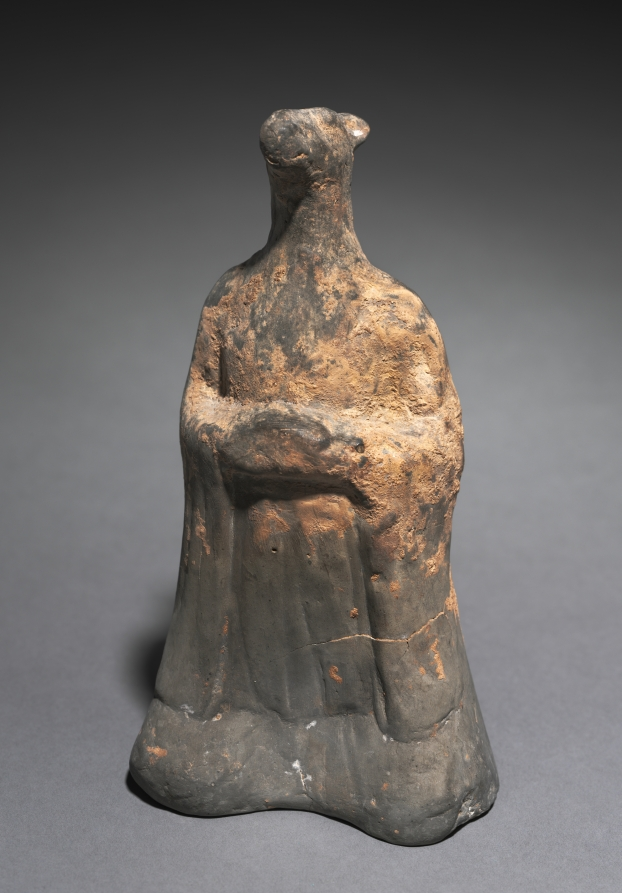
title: Mortuary Figure of the Zodiac Sign: Horse (Libra)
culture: China, Northern Wei dynasty (386-534)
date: 500s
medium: gray earthenware with traces of slip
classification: Sculpture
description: The twelve-animal zodiac series—rat, ox, tiger, rabbit, dragon, snake, horse, goat, monkey, rooster, dog, and boar—signifies a traditional Chinese concept of time structured in a cyclical order. The twelve animals are also linked to the art of fortune-telling that underlies human existence in connection with the changes of the universe. The use of the twelve zodiac animals as tomb furniture suggests they provided a cosmological structure for the afterlife.